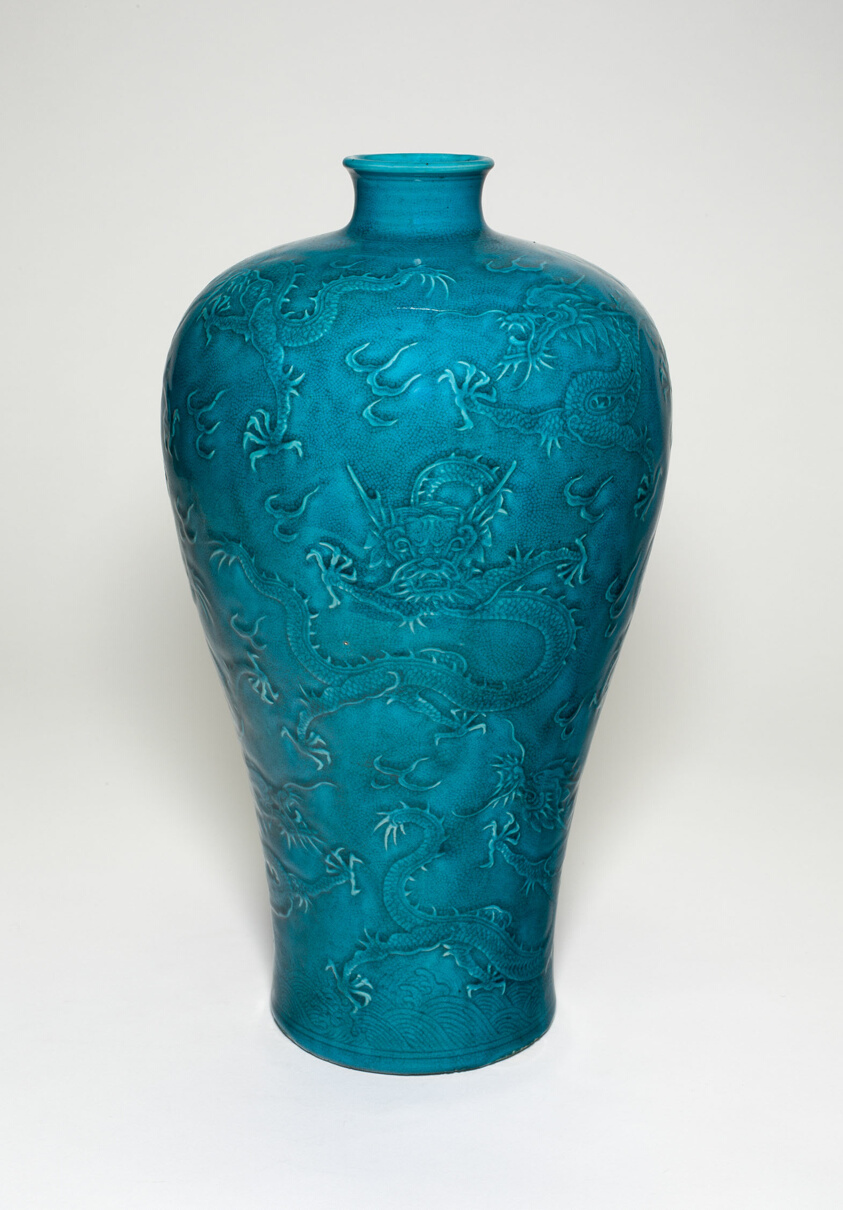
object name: Vessel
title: Bottle Vase (Meiping) with Dragons Rising from Waves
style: Chinese (culture or style)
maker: China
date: Qing dynasty (1644–1911), Yongzheng period (1723–1735)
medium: Porcelain with underglaze incised decoration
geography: China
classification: vase; vessel; porcelain; asian art; ceramics